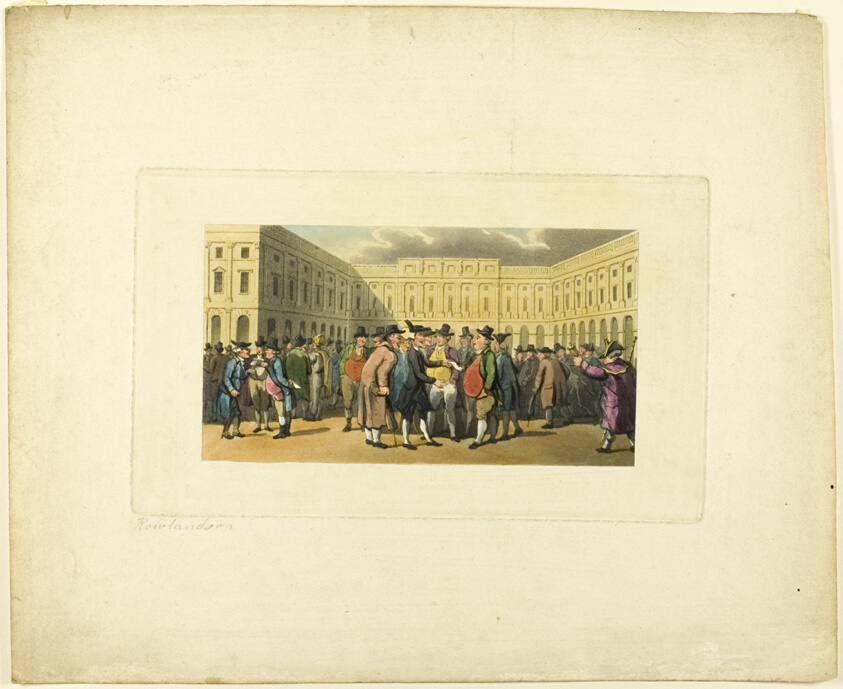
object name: Print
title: Doctor Syntax at Liverpool, from The Tour of Doctor Syntax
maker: Thomas Rowlandson (English, 1756-1827); published by Rudolph Ackermann (English, 1764-1834)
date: c. 1812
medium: Hand-colored etching and acquaint on ivory wove paper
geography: England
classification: etching; print; prints and drawing